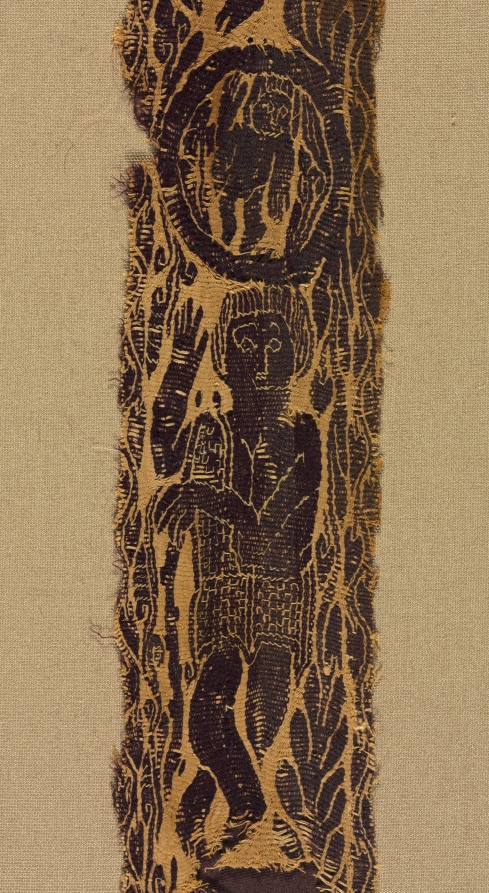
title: Ornamental Shoulder Band from a Tunic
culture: Egypt, Byzantine period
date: 600–650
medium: tapestry weave with supplementary weft wrapping; undyed linen and dyed wool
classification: Textile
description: On this tunic decoration, human figures appear to dance amid leafy plants. The first and third figures are shepherds, each wearing spotted animal–skin garments and holding wooden staffs. The second and fourth figures are dancers; the upper one wears a short draped garment (peplos), and the lower one appears nude except for a scarf draped over her shoulders. The brown-purple wool was dyed with kermes, a bluish-red dye from dried insects, and indigo in an unsuccessful attempt to imitate purple.